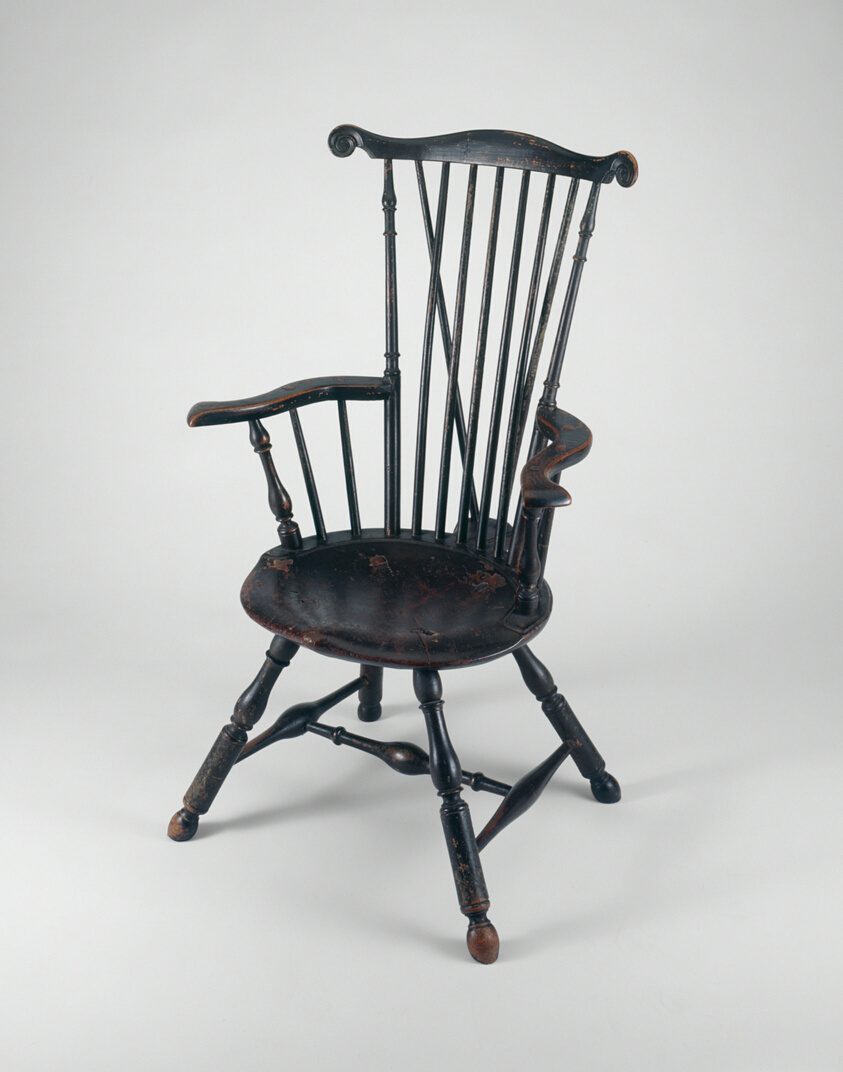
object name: Furniture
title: Fan-Back Windsor Chair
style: Folk Art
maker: Artist unknown (American, active 18th century); Philadelphia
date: 1760–70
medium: Tulipwood, maple, hickory, and oak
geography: Philadelphia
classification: seating; furniture; american decorative arts; american arts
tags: furniture